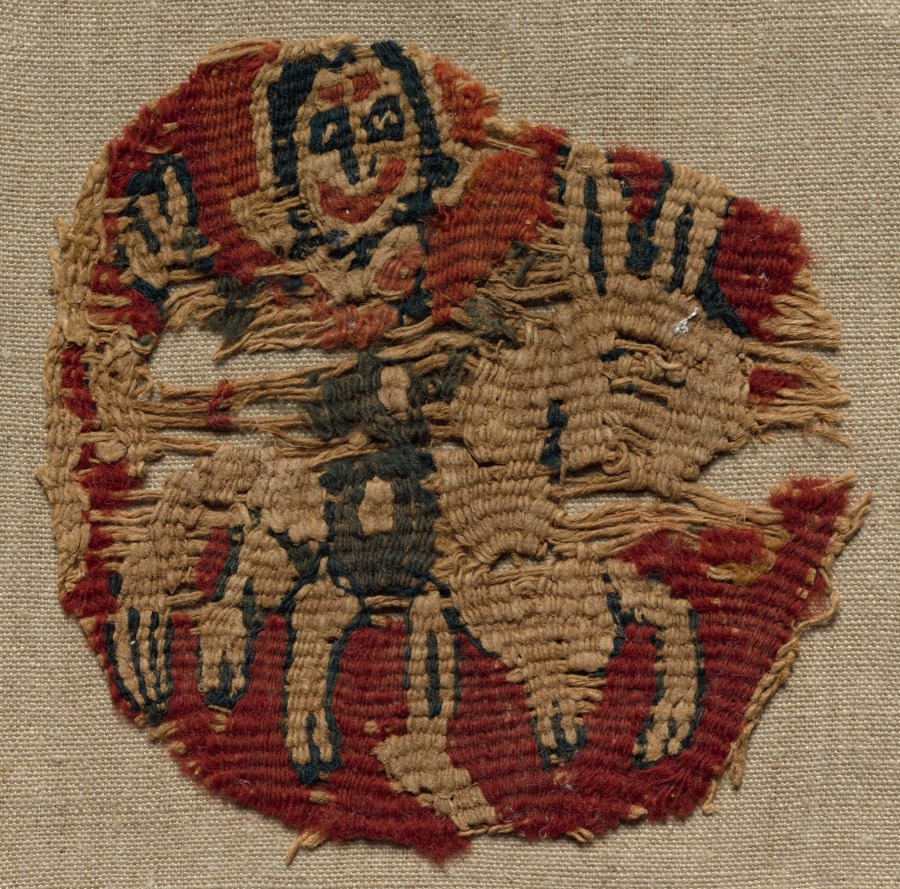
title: Fragment, Part of an Ornament from a Garment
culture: Egypt, Abbasid period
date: 800–850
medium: tapestry weave; wool and linen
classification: Textile